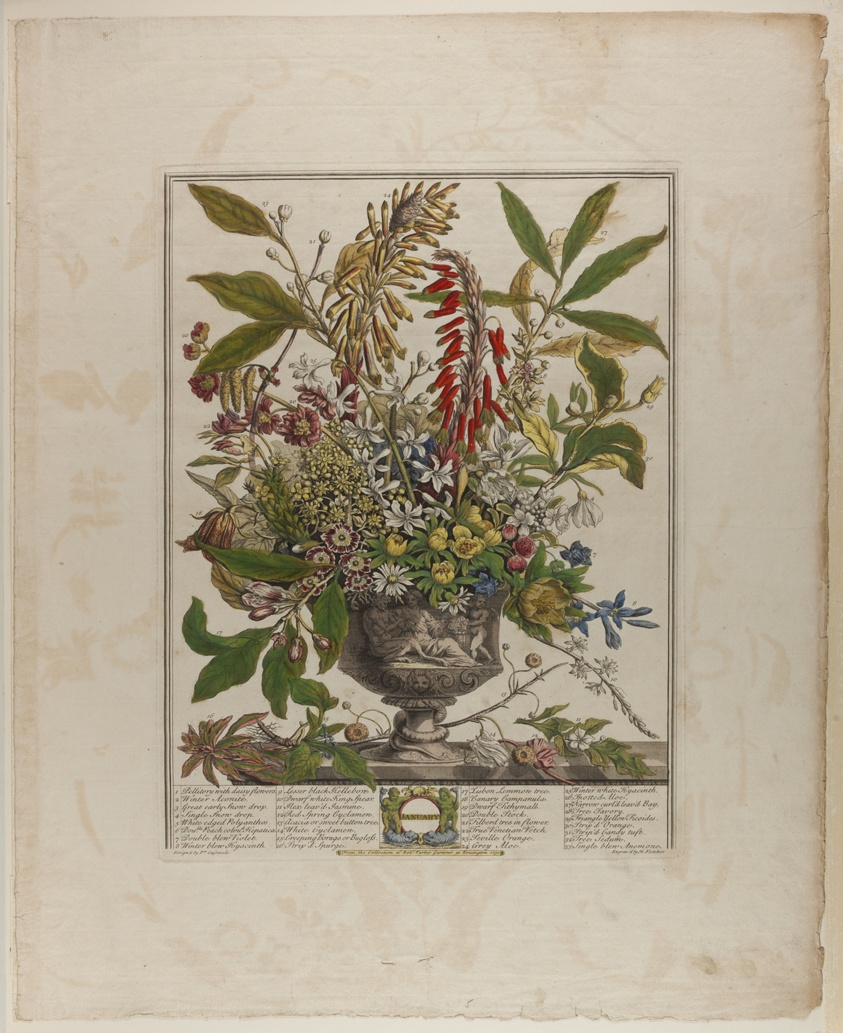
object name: Print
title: January, from Twelve Months of Flowers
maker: Henry Fletcher (English, 1710-1750); after Peter Casteels III (Flemish, 1684-1749)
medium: Engraving in black ink with opaque and translucent watercolor on cream laid paper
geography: England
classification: engraving; print; prints and drawing